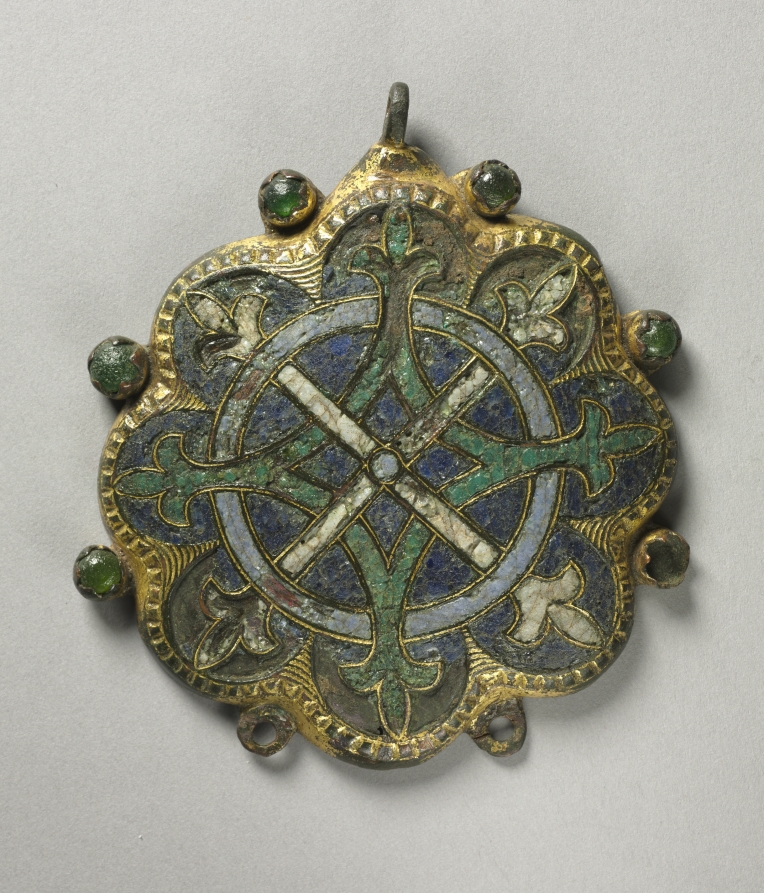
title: Harness Pendant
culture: France, Gothic period, 13th century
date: 1200s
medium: gilded copper, champlevé enamel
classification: Enamel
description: Probably a pendant (hanging ornament) because of the loop at the top, this plaque may have been hung from a horse's breast plate. It also could be a crusader's badge.